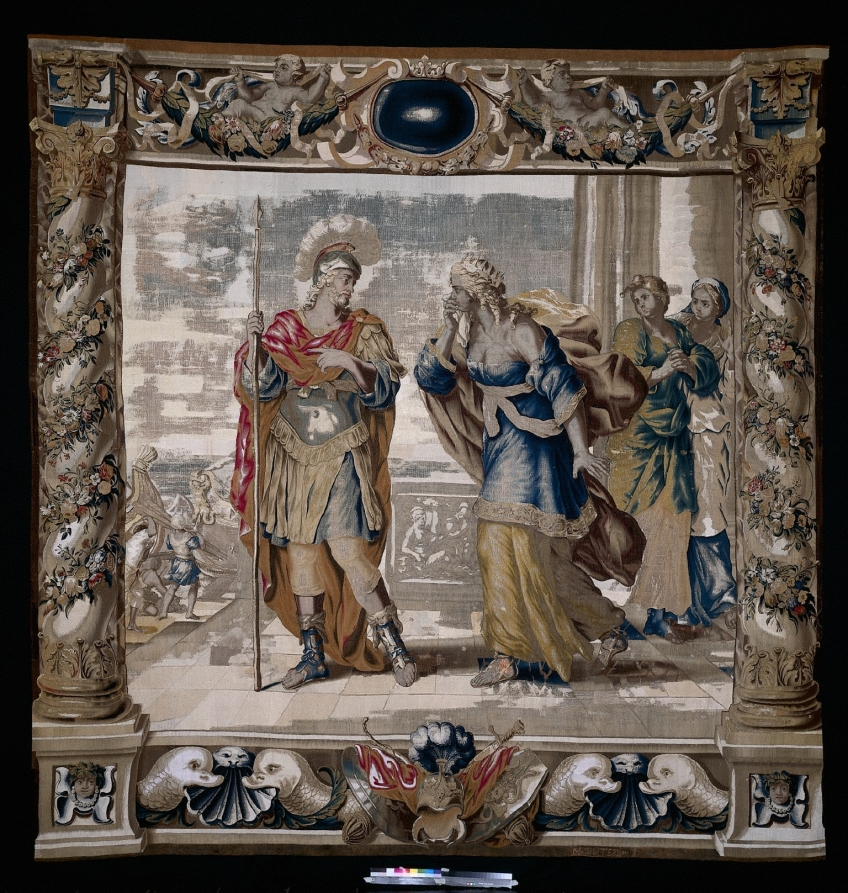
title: Aeneas says Farewell to Dido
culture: Belgium, 17th century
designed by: Giovanni Francesco Romanelli (Italian, 1610–1662)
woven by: Michael Wauters (Flemish, 1679)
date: 1679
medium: tapestry weave: silk and wool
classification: Tapestry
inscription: signed lower right: M. Wavters.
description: Ready to depart on the fleet which you can see behind him, Aeneas tells the distraught Dido that he must follow his destiny and leave Carthage.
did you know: This tapestry is one from a series of eight that depicts the tragic love story of Dido and Aeneas. They were gifted to the museum for display in the armor court.